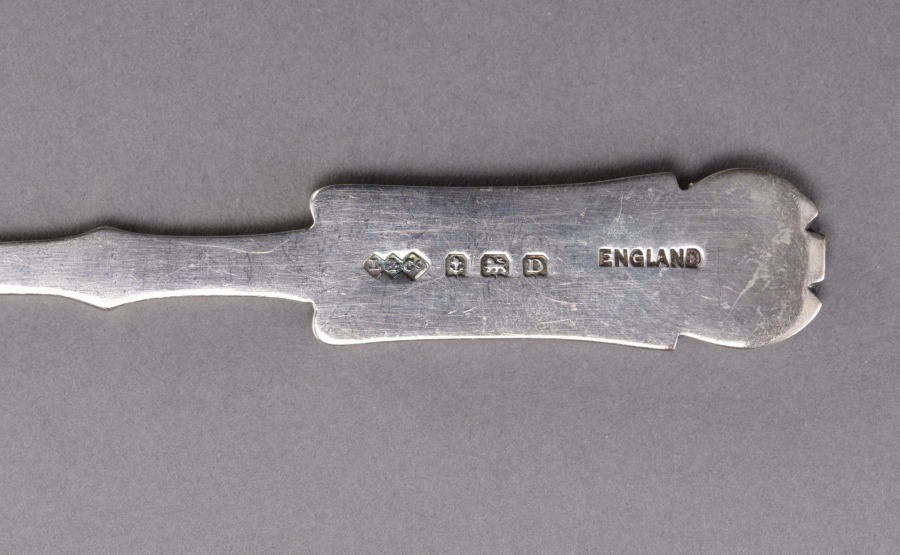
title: Set of six Spoons in Original Box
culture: England, London, 19th century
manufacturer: Liberty and Company (British)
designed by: attributed to Archibald Knox (British, 1864–1933)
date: c. 1895–1910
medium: Silver, enamel decoration and leather box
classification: Silver